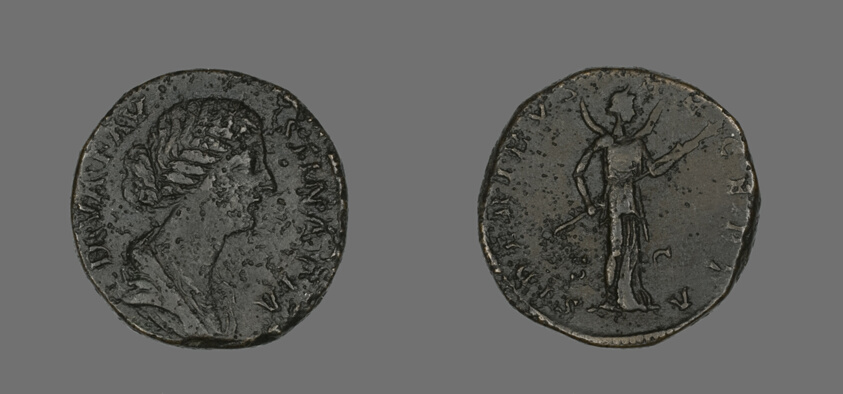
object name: Coin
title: Sestertius (Coin) Portraying Empress Faustina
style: roman (ancient, style or period)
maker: Roman, minted in Rome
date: 176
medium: Bronze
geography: Roman Empire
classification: coin; ancient art